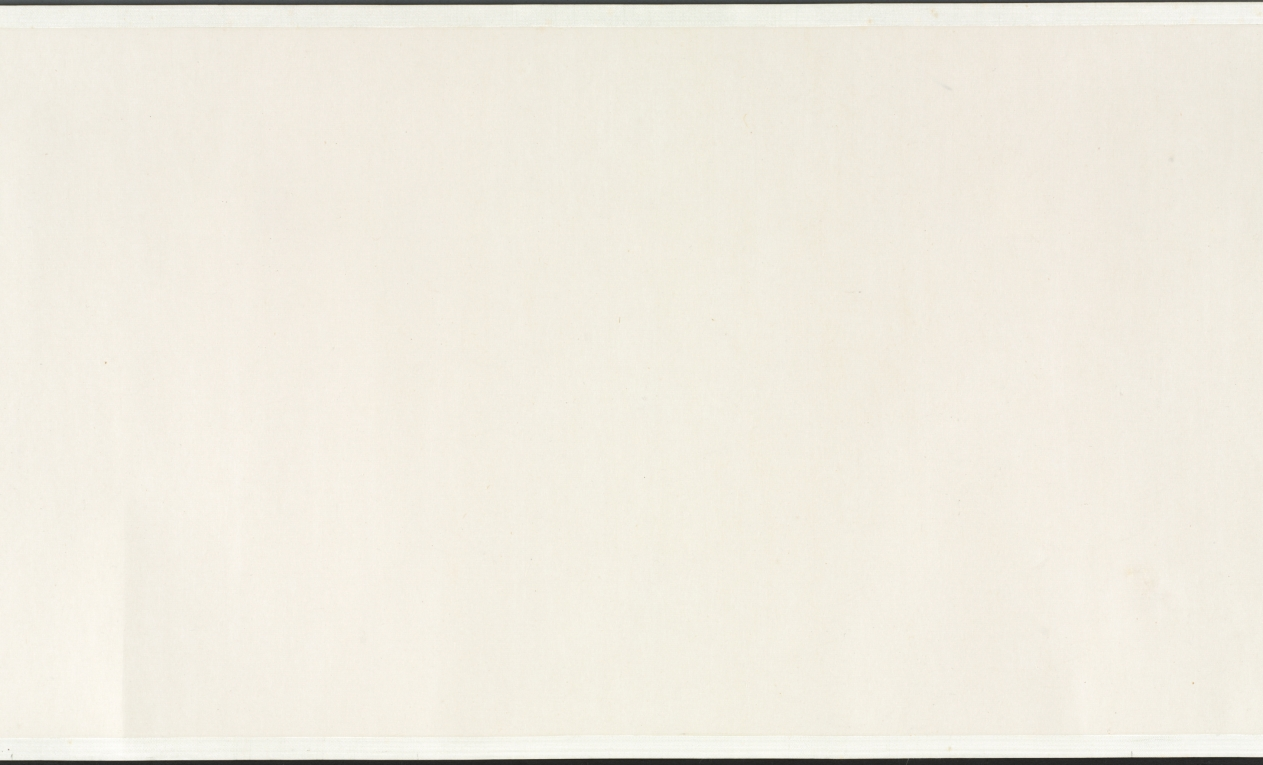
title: Buddha's Conversion of Five Bhiksu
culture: China, Yuan dynasty (1271–1368)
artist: Li Sheng (Chinese, active c. 1324–after 1375)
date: mid-1300s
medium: handscroll; ink on paper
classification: Painting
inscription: 紫篔生李升識 [印] 李氏子雲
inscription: 4 colophons and 12 additional seals: The "Heart" Sutra (Maha Prajnaparamita) text written by Wu Yuqing 吳餘慶 (active early 1400s); 2 seals of Xu Qianxue 徐乾學 (1631–1694); 3 colophons, one dated 1929 and two dated 1936, and 9 seals of Wu Hufan 吳湖帆 (1894–1968); 1 colophon, dated 1932, of Chen Dingshan; 1 seal unidentified.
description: This episode stems from the life of the historical Buddha, who, after his enlightenment, was initially hesitant about preaching his own doctrine. After much personal deliberation and prodding by deities, he finally relented. The first converts were the five guards who served him when he was still a prince. For Li Sheng, this is the pretext of the painting, which moves from the interaction of the bhiksu with the Buddha to a broader awareness of the vast surroundings of the scene.